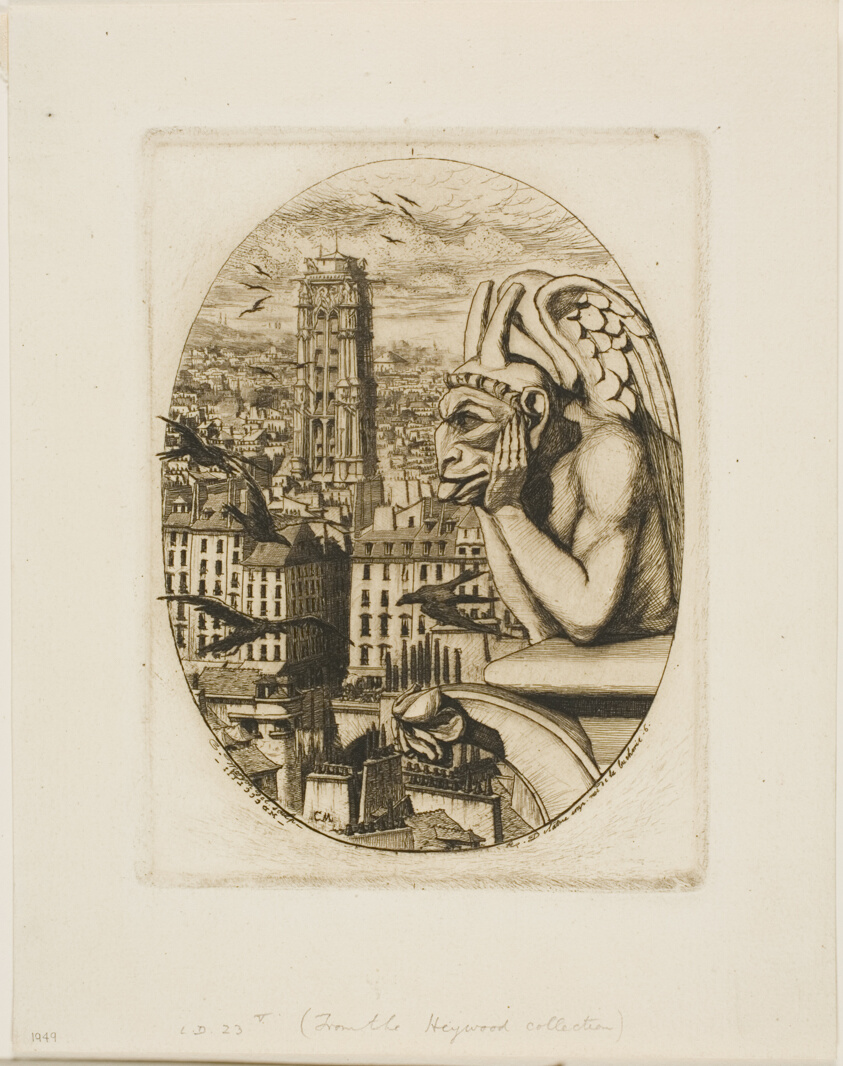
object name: Print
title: The Vampire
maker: Charles Meryon (French, 1821-1868); printed by Auguste Delâtre (French, 1822-1907)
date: 1853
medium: Etching and drypoint in dark brown on ivory wove paper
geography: France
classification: etching; print; prints and drawing